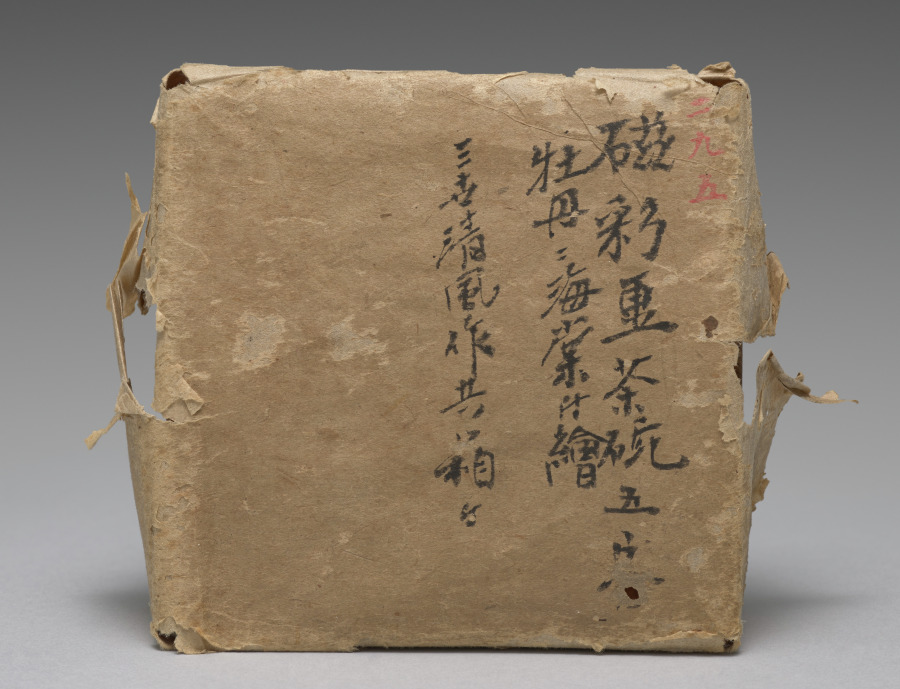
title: Teabowls with Peony and Crabapple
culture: Japan, Meiji period (1868–1912)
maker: Seifū Yohei III (Japanese, 1851–1914)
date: 1893–1914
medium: Set of five teabowls; porcelain with underglaze and overglaze color enamels and gold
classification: Ceramic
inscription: 清風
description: Overglaze color enamels are generally called iro-e (literally “color picture”) in the terminology customarily used for porcelain decoration of the Edo period. This set of teabowls is a fine example of Yohei III’s skilled use of the technique, which is identified on this set’s box lid with the alternate phrasing “porcelain with color painting” (jisaiga). Distinct from the way overglaze colors were used in Kakiemon ware from Arita, his designs and applications show a consciousness of porcelain decoration of the Qing dynasty. Here, he combines Chinese models with a sensibility taken from Kyoto ware precedents, including painting with powdered gold (kinrande). The colors used in the bowls are as follows: blue, black, gold, white, light green, green, and pink. The blue appears only inside the footring, as a double band of underglaze color. The black iron, used for stems and leaf veins, is painted over the glaze. The gold, also painted over the glaze, is used for leaves and the centers of flowers, for solid, glossy lines defining detail, or as a semimatte ground. The white of the peony flower is built up to a low relief over the glaze. Yohei has incised lines of varying widths into the pigment, carving away to the bowl’s surface, to differentiate individual petals and their rippled shapes. The light and dark greens, as well as the pink, are painted over the glaze. Of note is how Yohei has first used thinly applied lines of light green to draw the plum branch before applying the opaque iron black. For the plum buds and flowers, he has used a diluted pink with an opaque pink for outline, both over the glaze. In his later works, Yohei used pink both over and under the glaze in a manner similar to underglaze blue, and it can be challenging in some cases to discern which technique he has used. A lidded container in a private collection has a similar design but is augmented with the inclusion of white and purple magnolia blossoms. In contemplating the original decorative program of a set, of which these teabowls may have been a part, it is worth considering that perhaps not all objects included the full range of motifs. In such cases, the composition of the individual object may be best understood within the context of the extended ensemble. Here, the delicate pink plum on one side of the bowl seems slightly unbalanced with the bold white peony on the other, but when seen with other objects with the magnolia and its additional colors and shapes, it is possible to imagine a set with a complex, balanced design across multiple pieces.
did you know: These five teabowls were likely from a larger set of teaware.